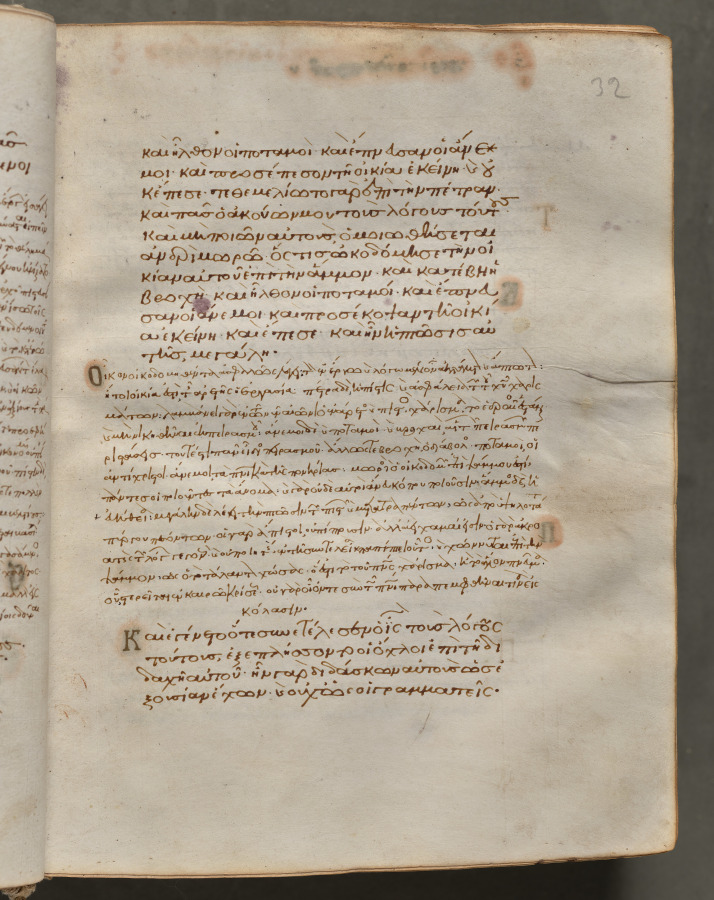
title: Text, folio 32 (recto), from a Gospel Book with Commentaries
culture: Byzantium, Constantinople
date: c. 1000–1100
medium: ink, tempera, and gold on vellum; leather binding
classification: Bound Volume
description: Each of the four gospels in this book opens on a page with brilliantly illuminated borders depicting the author of the text as well as birds—principally peacocks, symbols of the immortality of the soul—and fountains, representing the fountain of life and the salvation of the soul. This volume consists of 428 leaves with texts in Greek. Its level of sophistication suggests that it was probably written and decorated in a monastery in Constantinople.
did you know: Gospel Books were carried in procession through Byzantine churches.